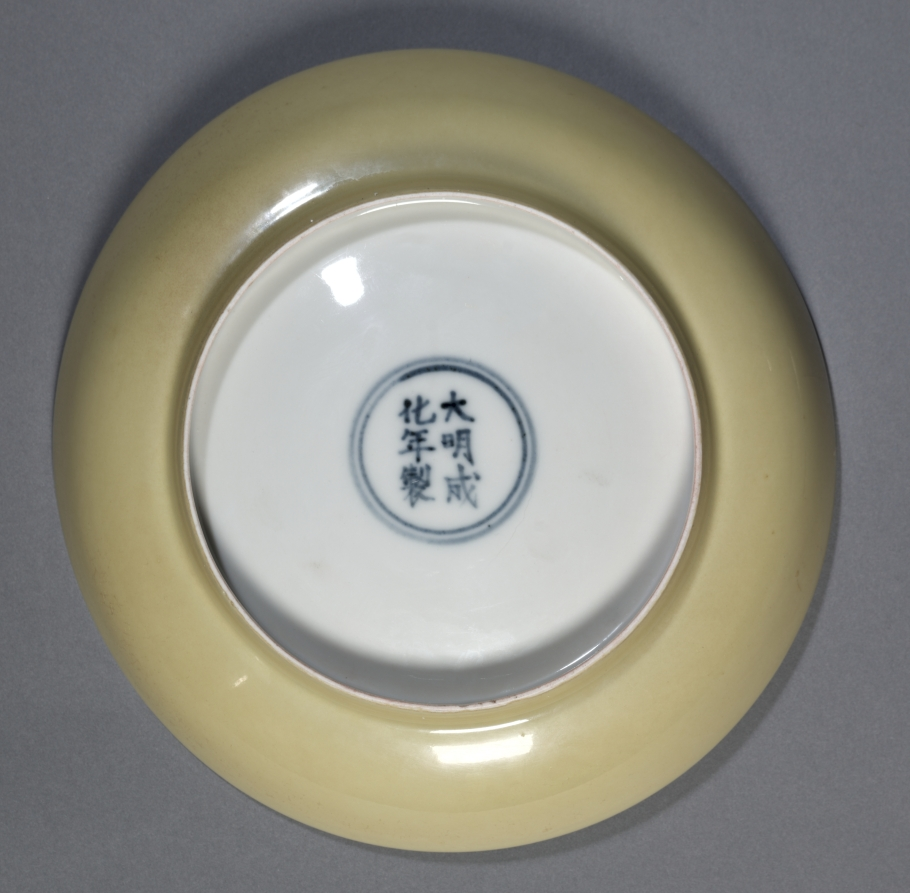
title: Dish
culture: China, Jiangxi province, Jingdezhen, Ming dynasty (1368-1644), Chenghua mark and period (1465-1487)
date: 1465–87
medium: porcelain with yellow glaze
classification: Ceramic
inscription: 大明成化年製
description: Former director Sherman Lee stressed the significance of technical innovation in his study of Chinese ceramics. He believed that "in the great Chinese [ceramic] tradition one can say that its major theme is the development and refinement of monochrome stoneware and porcelain . . . [E]ven in the Ming and Qing dynasties, equal attention was given to monochrome reds and yellows." This masterpiece of Ming monochrome ware was part of the Millikins' generous bequest, one that significantly augmented the museum's already strong holdings of Chinese ceramics. Lee pointed out that with this bequest the museum's collection is "reasonably complete and, even better, represented by works of high quality."